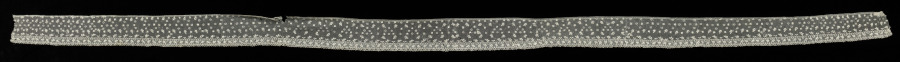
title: Lace Edging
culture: France, Alençon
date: 1760–99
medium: Needle lace (Point d'Alençon)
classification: Lace